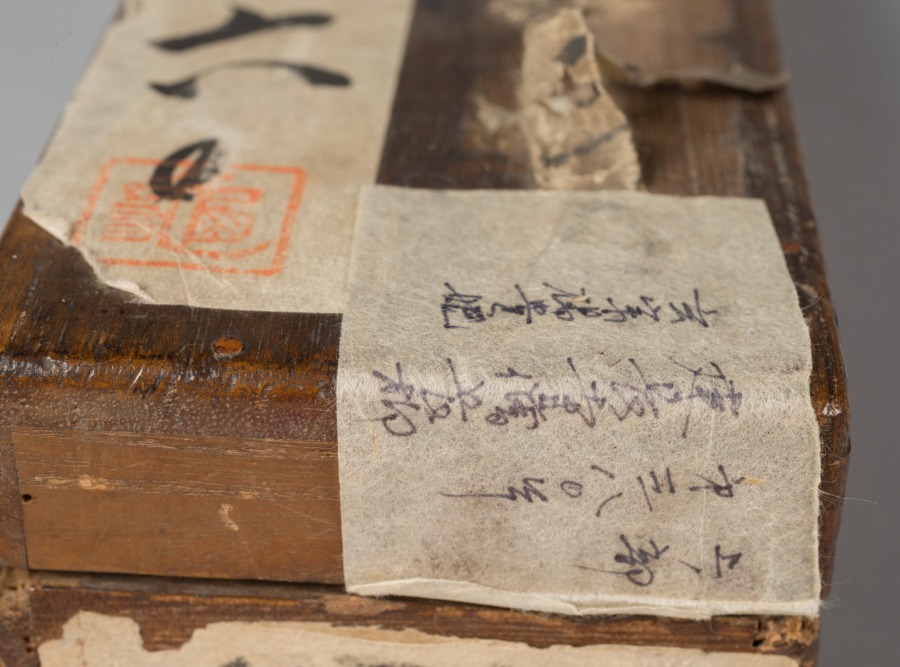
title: Emperor Minghuang Teaching Yang Gueifei to Play the Flute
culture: Japan, Muromachi period (1392–1573)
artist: Choryusai (Japanese)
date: late 1400s–early 1500s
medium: hanging scroll; ink and color on paper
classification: Painting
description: Minghuang, a prominent emperor of Tang (618-906) China and his consort, Yang Gueifei, have inspired many legends, paintings, and poetry in later Chinese culture. Through the study of Chinese literature and the collecting of Chinese paintings, tales of their lives and romance became well-known in Muromachi Japan.